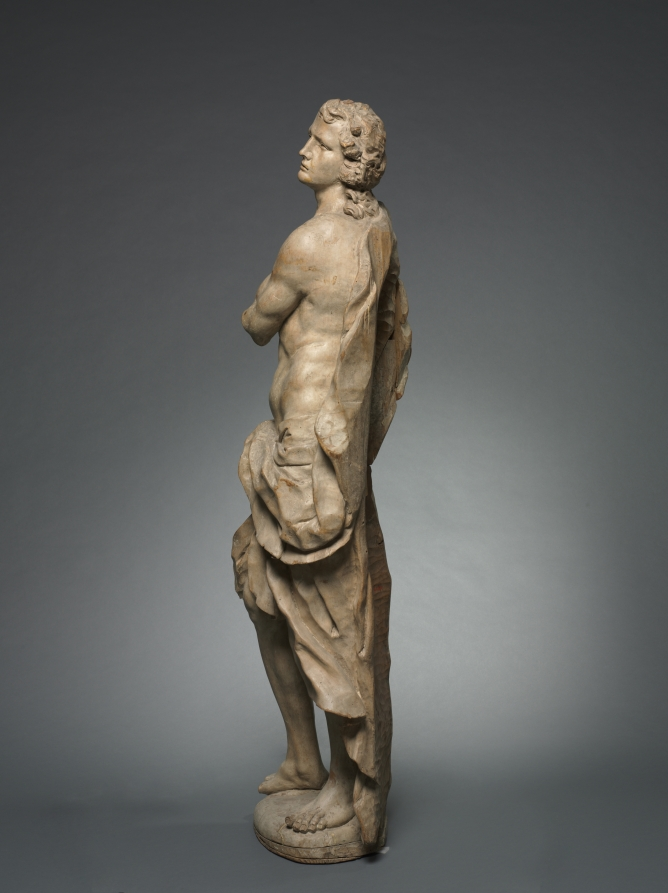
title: A Saint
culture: Germany or Austria, 18th century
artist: follower of Diego Francesco Carlone (Italian, 1674–1750)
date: c. 1730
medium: wood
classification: Sculpture